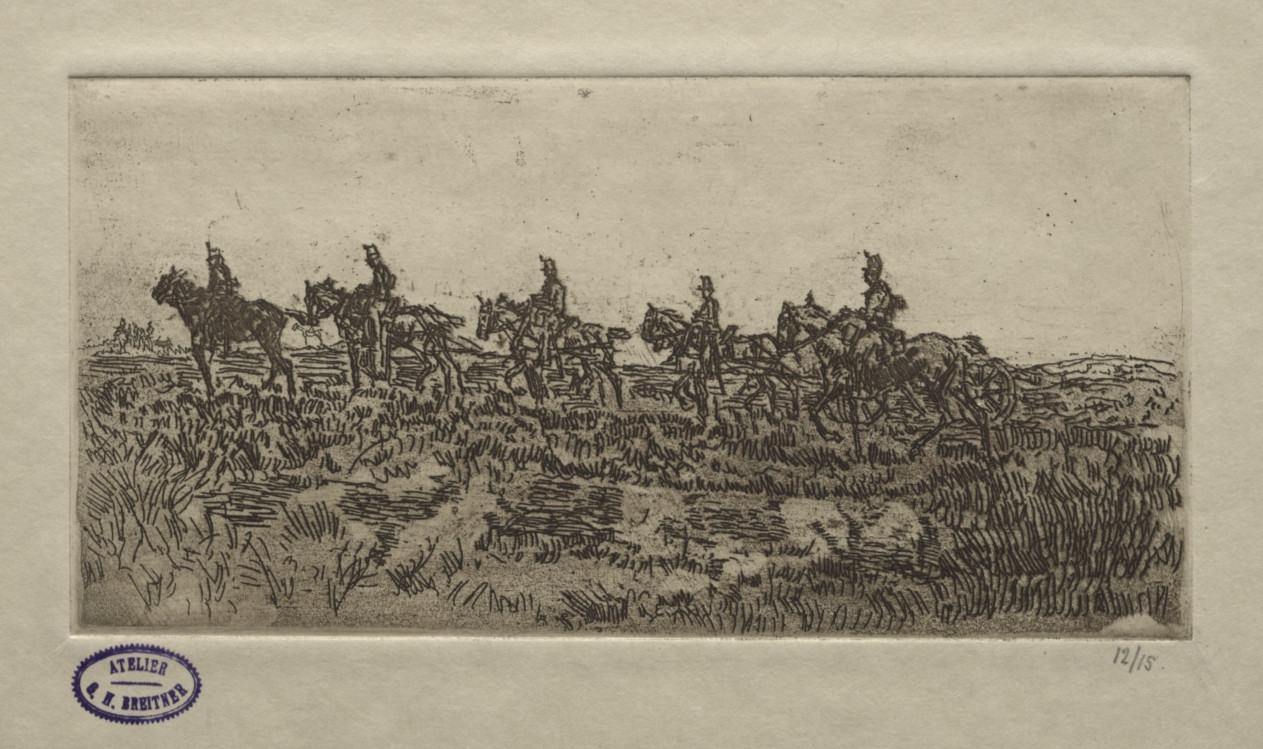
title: Cavalry Scene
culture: Netherlands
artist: George Hendrik Breitner (Dutch, 1857–1923)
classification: Print